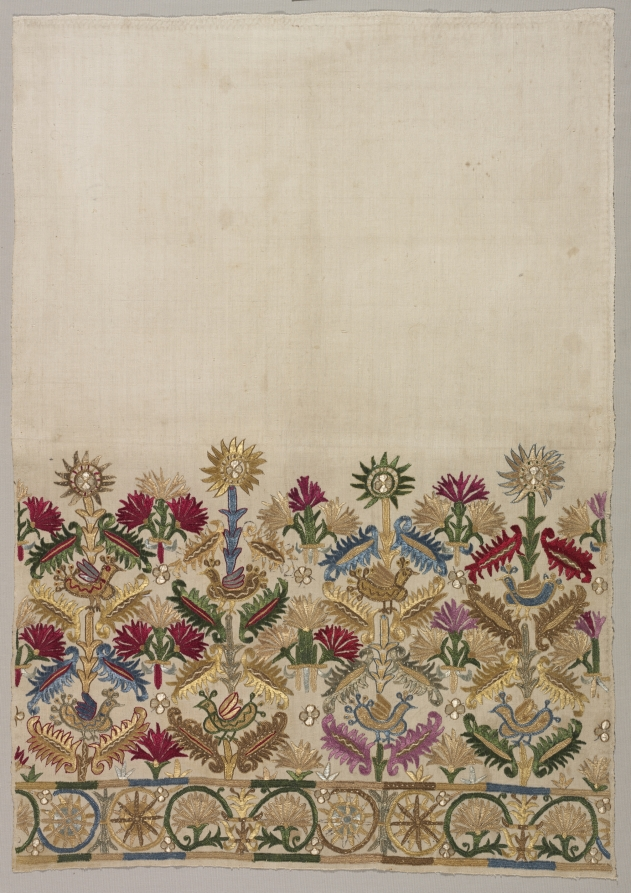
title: Fragment of a Skirt Border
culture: Greece, Crete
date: 1600s–1700s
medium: embroidery: silk on linen tabby ground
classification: Embroidery